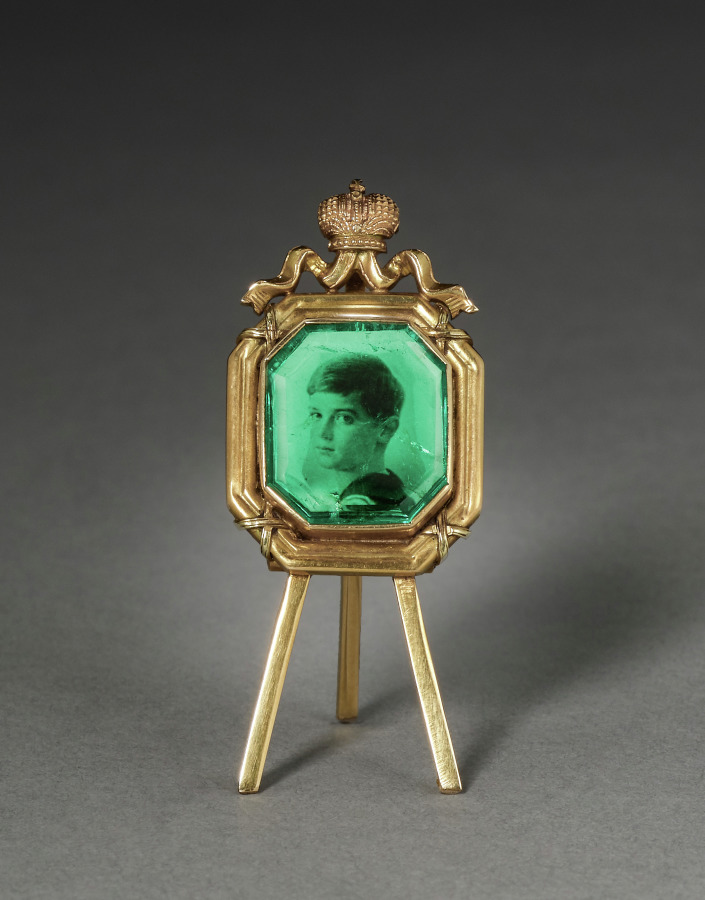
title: Gold Easel and Photograph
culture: Russia, St. Petersburg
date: before 1896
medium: gold, enamel, sapphire, gold easel and stand, photograph covered with faceted green glass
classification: Miscellaneous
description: In the Russian Orthodox religious tradition, eggs are offered as Easter gifts to symbolize rebirth, renewal, and the resurrection of Christ. This jeweled Russian egg is engraved with XB symbolizing the phrase, “Christ is risen,” and would have been given to a lady in a wealthy household, perhaps someone of high rank within the imperial court, given the richness of materials.